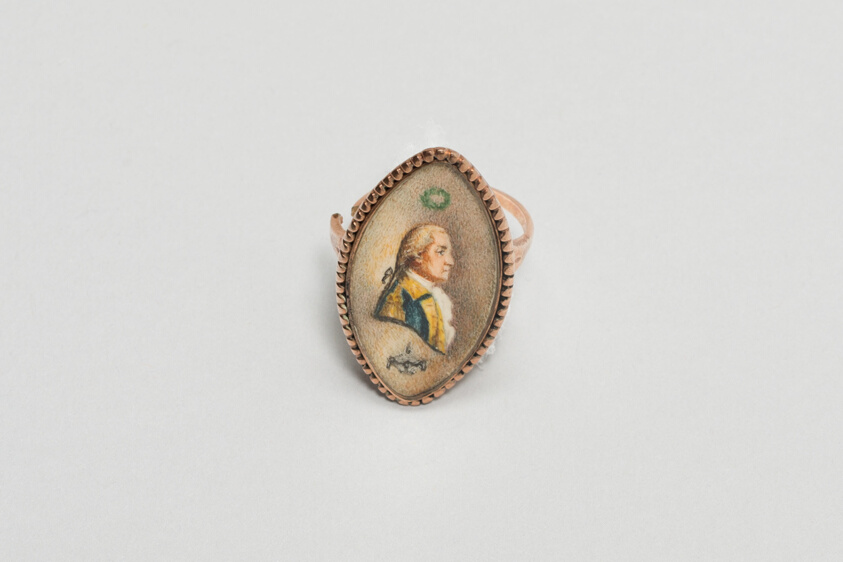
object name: Decorative Arts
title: Ring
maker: Artist unknown (American, 19th century)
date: 1800–1900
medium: Gold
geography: United States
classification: ring (jewelry); jewelry; american decorative arts; american arts; decorative arts